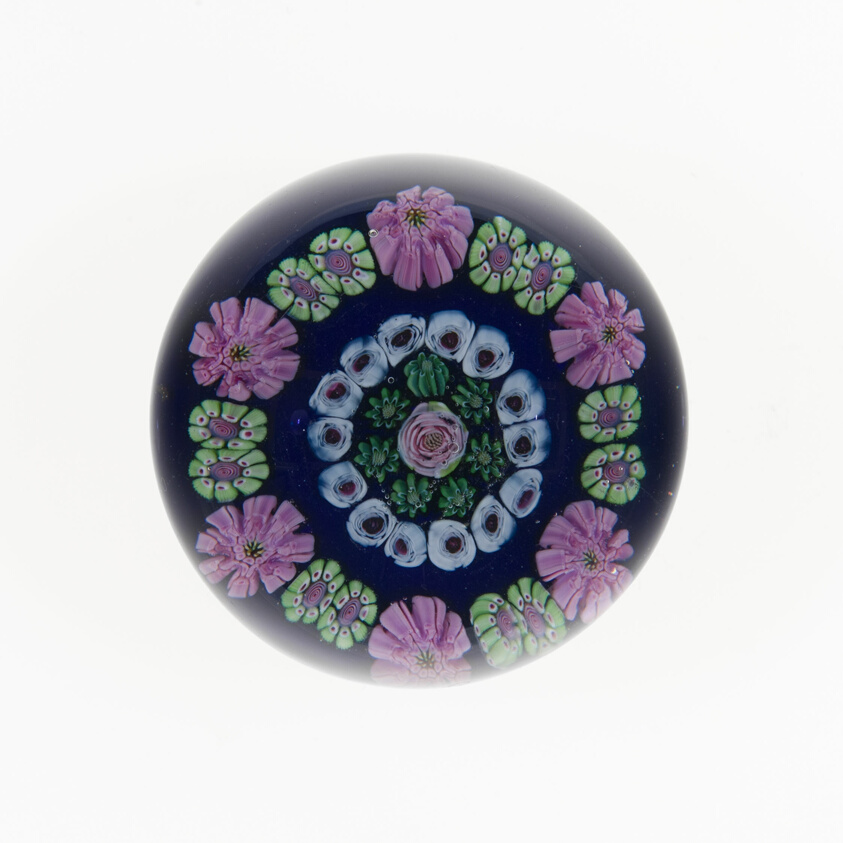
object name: Glass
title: Paperweight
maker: Clichy Glassworks (Cristalleries de Clichy); Clichy, France, 1837-1885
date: 19th century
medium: Glass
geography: Clichy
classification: paperweight; millefiori; european decorative arts; glass